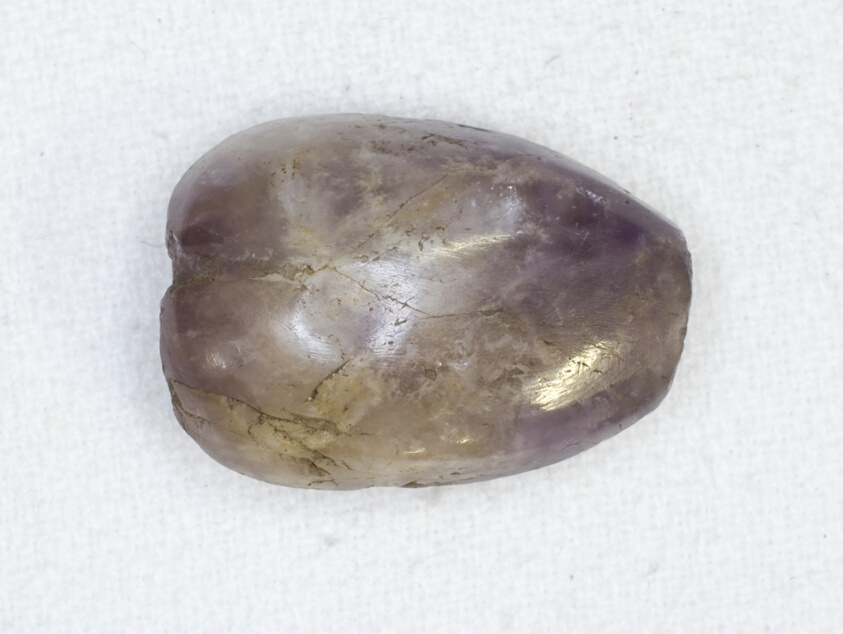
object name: Costume and Accessories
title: Bead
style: middle kingdom, twelfth dynasty, ancient, egyptian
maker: Egyptian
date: Middle Kingdom, Dynasty 12 (about 1985–1773 BCE)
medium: Amethyst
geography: Egypt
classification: bead; stone; ancient art; costume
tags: jewelry